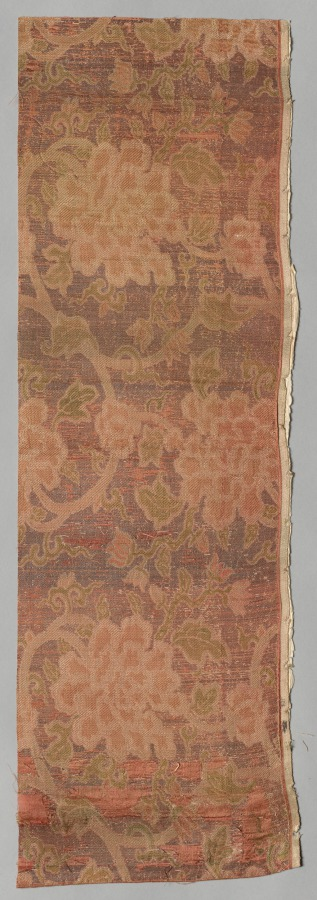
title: Textile Fragment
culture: Japan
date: 1800s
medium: silk, metallic thread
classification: Textile